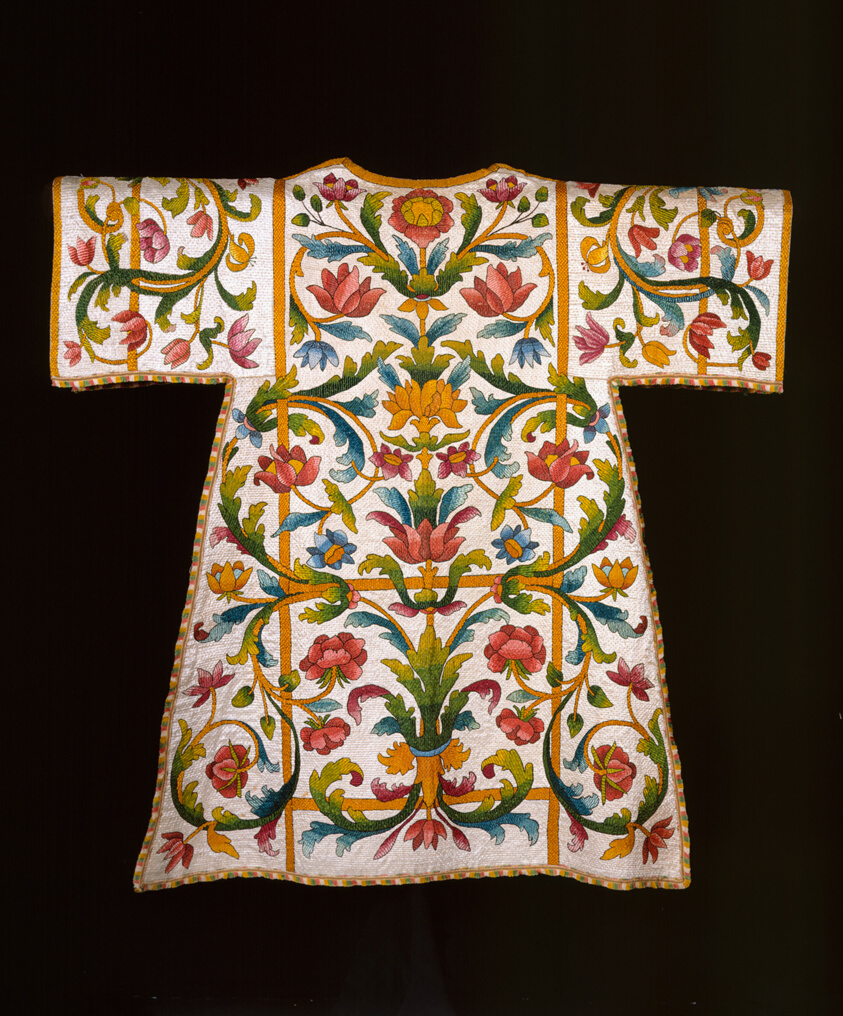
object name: Textile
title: Dalmatic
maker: Italy or Spain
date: c. 1700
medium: Hemp, plain weave; embroidered with silk in satin and split stitches; laid work and couching; edged with silk, warp-faced weft-ribbed plain weave extended weft cut woven fringe; lined with cotton, plain weave; glazed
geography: Italy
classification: textile; needlework (visual works); costume; liturgical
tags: flowers, foliage